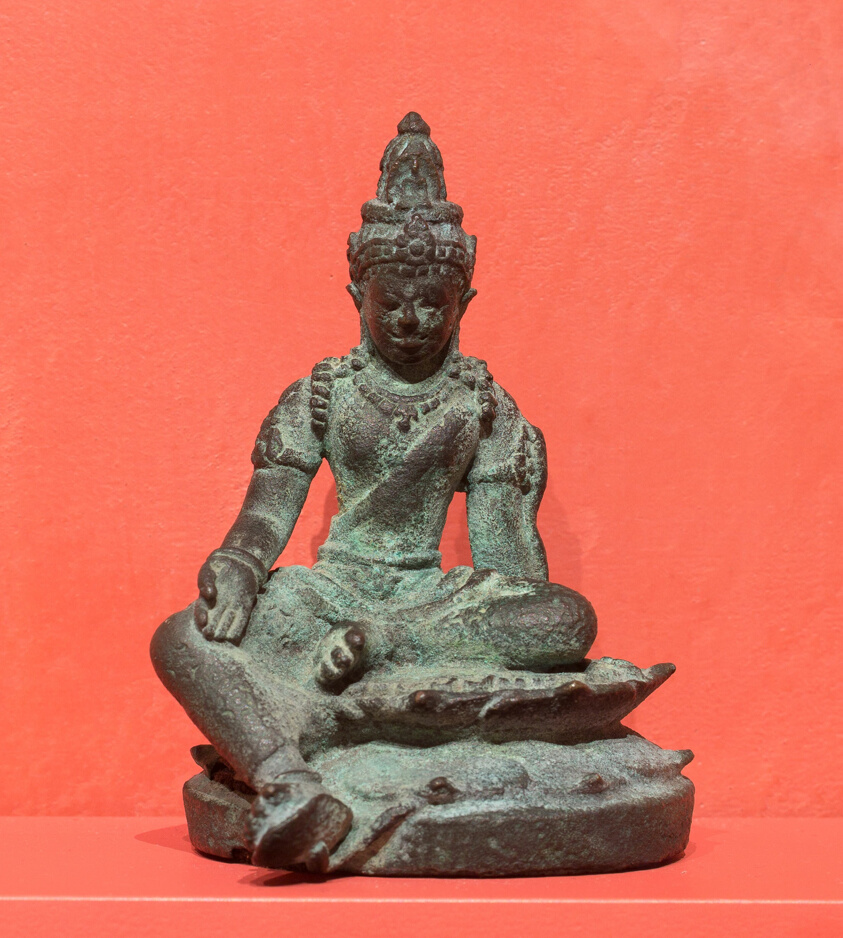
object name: Sculpture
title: Bodhisattva Avalokiteshvara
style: Southeast Asian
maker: Indonesia; Central Java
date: 9th/10th century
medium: Bronze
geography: Central Java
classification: bronze; metal; sculpture; asian art